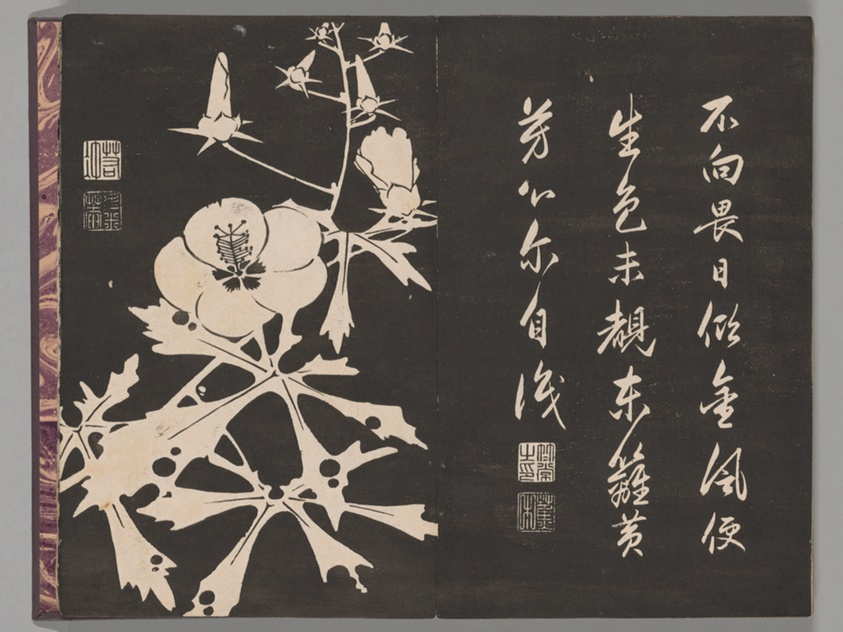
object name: Book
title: Soken sekisatsu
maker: Ito Jakuchu (Japanese, 1716-1800)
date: 1767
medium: Woodblock printed book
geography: Japan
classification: book